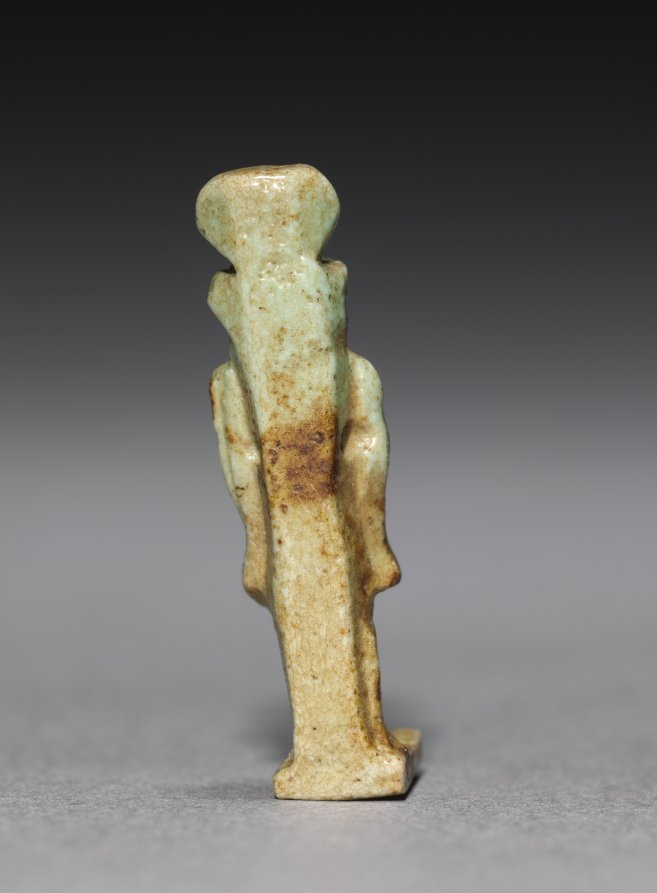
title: Amulet of Ra-Horakhty (?)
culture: Egypt, Late period (715–332 BCE), Dynasty 30–Greco-Roman period (332 BCE–395 CE), Ptolemaic dynasty (305–30 BCE)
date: 380–30 BCE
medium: gray green faience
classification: Amulets